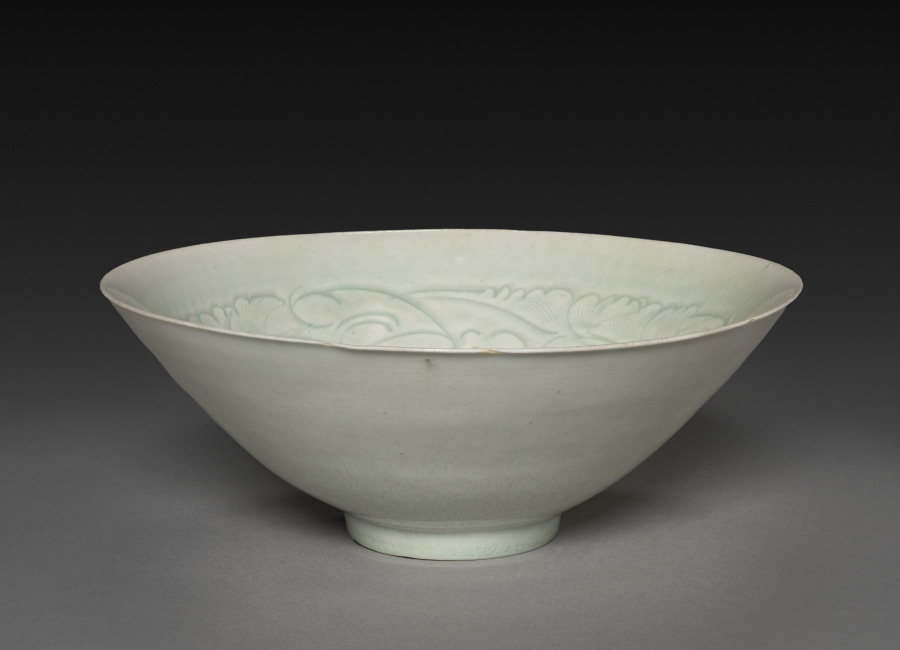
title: Conical Bowl with Carved Babies and Floral Motif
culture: China, Song dynasty (960-1279)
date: 960–1279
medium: Porcelain with pale bluish-white glaze, qingbai ("blue-white") ware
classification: Ceramic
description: The conical shape of this bowl is especially suitable for whipping powdered tea, which became popular at court, in monasteries, and in scholarly elite circles during the Southern Song dynasty. The decoration of this bowl was cut with a wooden instrument into the dried clay. This type of white porcelain with a translucent bluish glaze was the direct predecessor of the later blue-and-white porcelains.